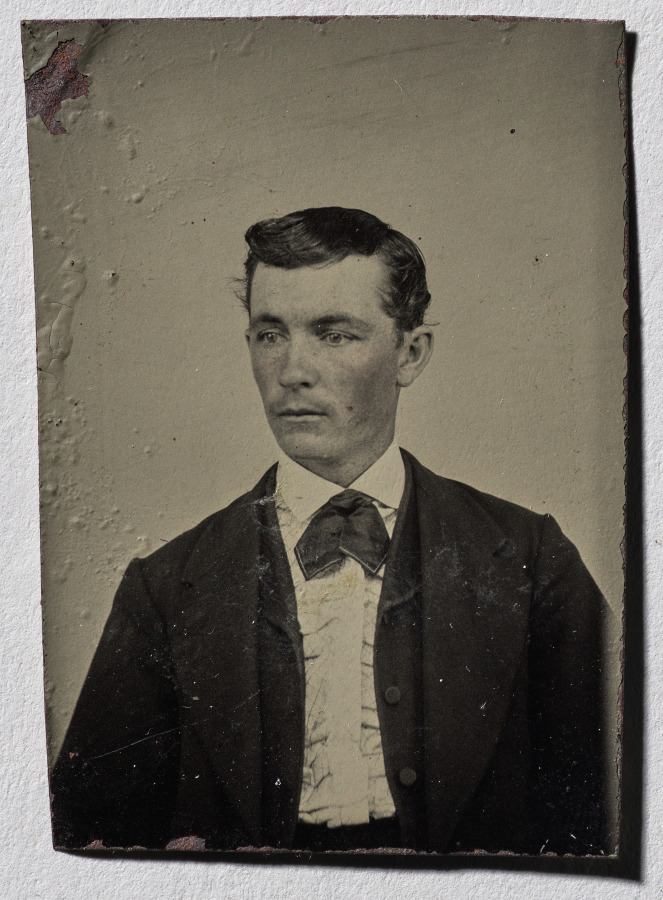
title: Untitled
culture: America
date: c. 1860s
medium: tintype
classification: Photograph